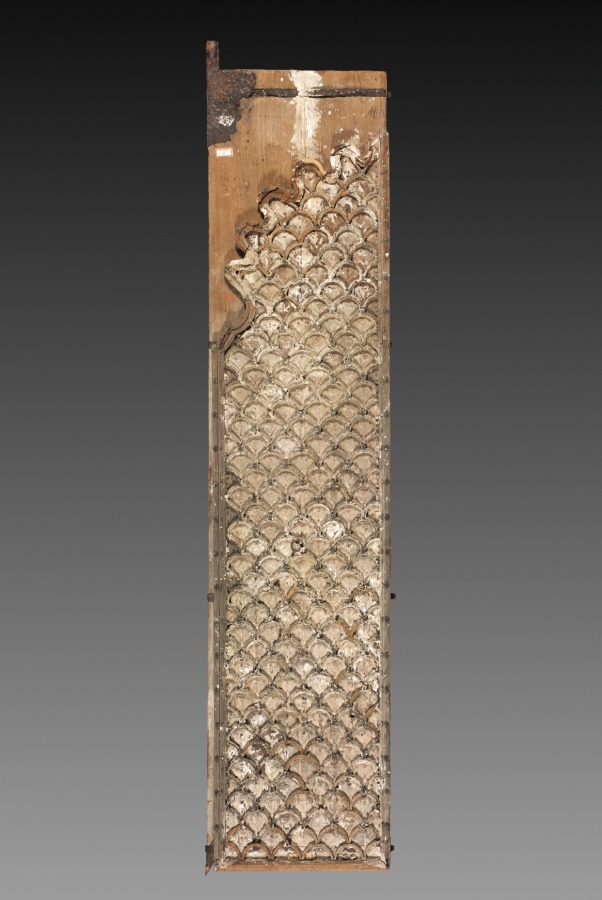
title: Painted Door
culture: Northwestern India, Rajasthan, possibly Rajput kingdom of Bundi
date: c. 1820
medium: color on wood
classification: Painting